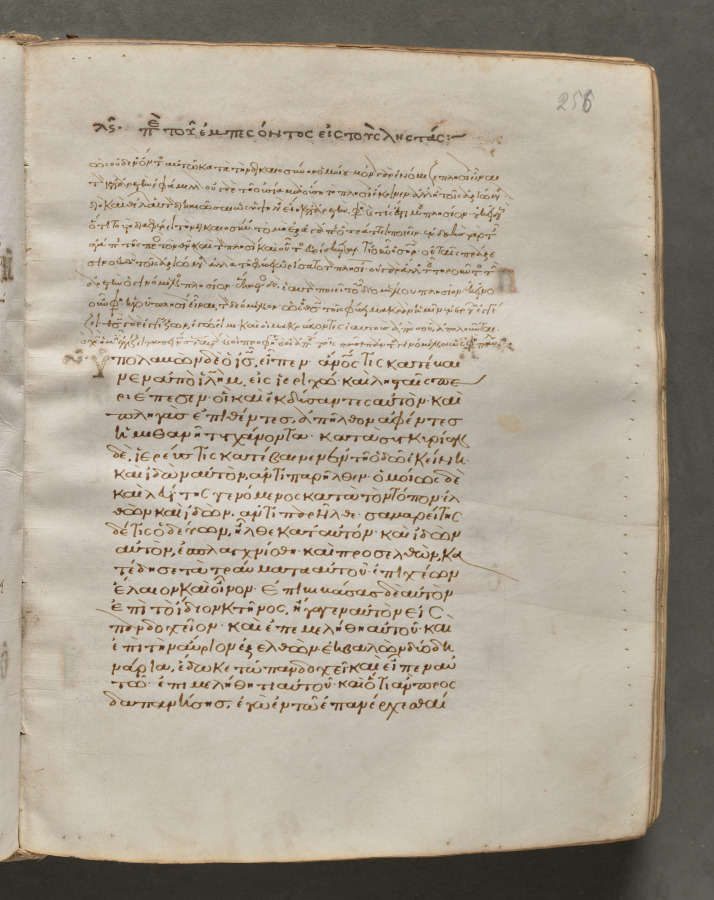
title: Text, folio 256 (recto), from a Gospel Book with Commentaries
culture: Byzantium, Constantinople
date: c. 1000–1100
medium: ink, tempera, and gold on vellum; leather binding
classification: Bound Volume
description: Each of the four gospels in this book opens on a page with brilliantly illuminated borders depicting the author of the text as well as birds—principally peacocks, symbols of the immortality of the soul—and fountains, representing the fountain of life and the salvation of the soul. This volume consists of 428 leaves with texts in Greek. Its level of sophistication suggests that it was probably written and decorated in a monastery in Constantinople.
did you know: Gospel books were carried in procession through Byzantine churches.